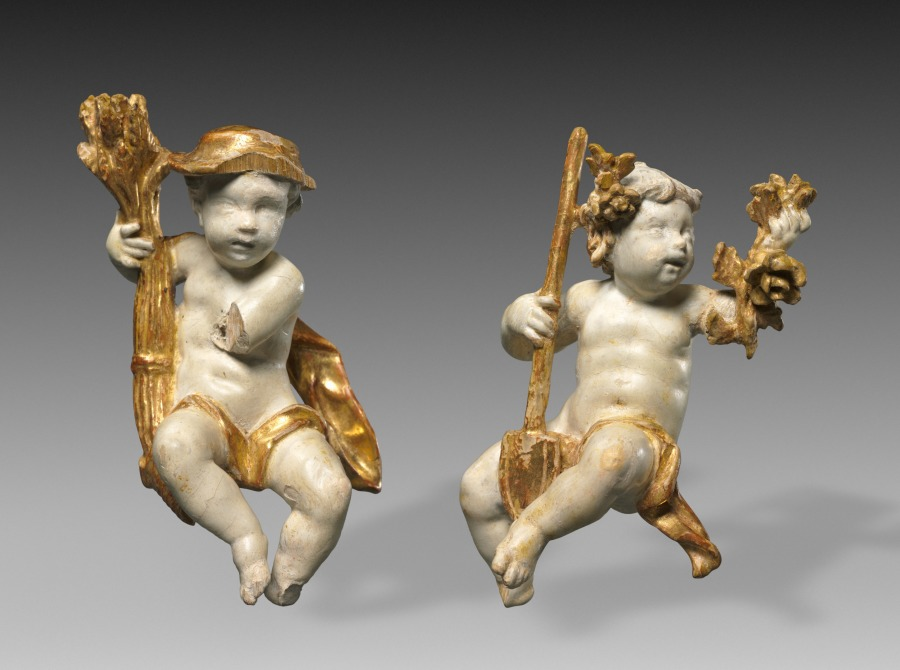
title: Pair or Putti Statuettes: Putto as Summer and Putto as Spring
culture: Germany, 18th century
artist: Ferdinand Tietz (Austrian, 1708–1777)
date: c. 1765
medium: painted and gilded wood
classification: Sculpture